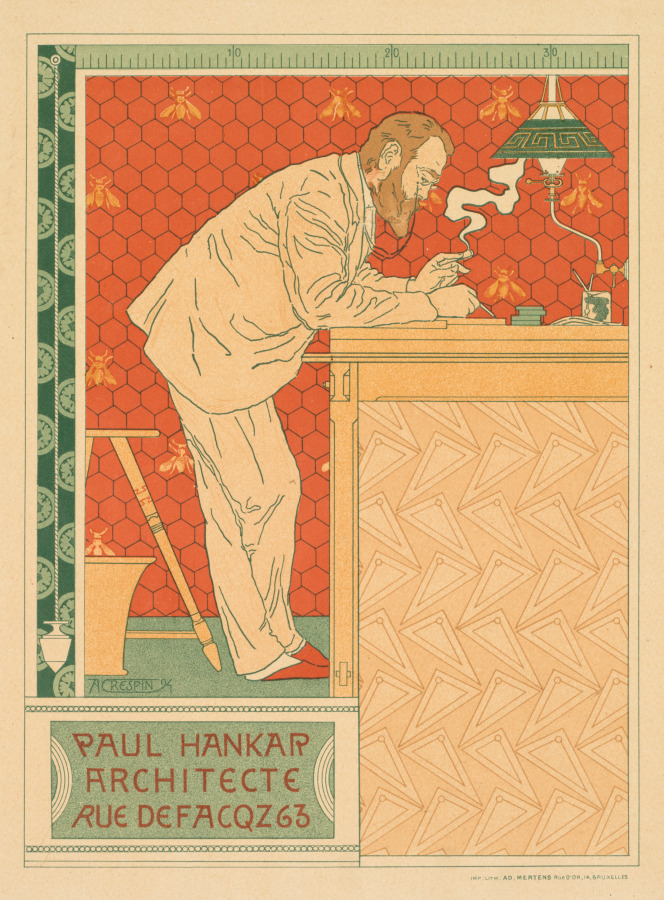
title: Les Maitres de l'Affiche, Pl. 91: Paul Hankar, Architecte rue defacqz 63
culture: Belgium, 19th century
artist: Adolphe Crespin (Belgian, 1859–1944)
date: c. 1894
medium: color lithograph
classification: Print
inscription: In plate, lower left corner: Les Maitres de l'Affiche: Pl. 91, Imprimerie Chaix, (Encres Lorilleux 8 Cie.);